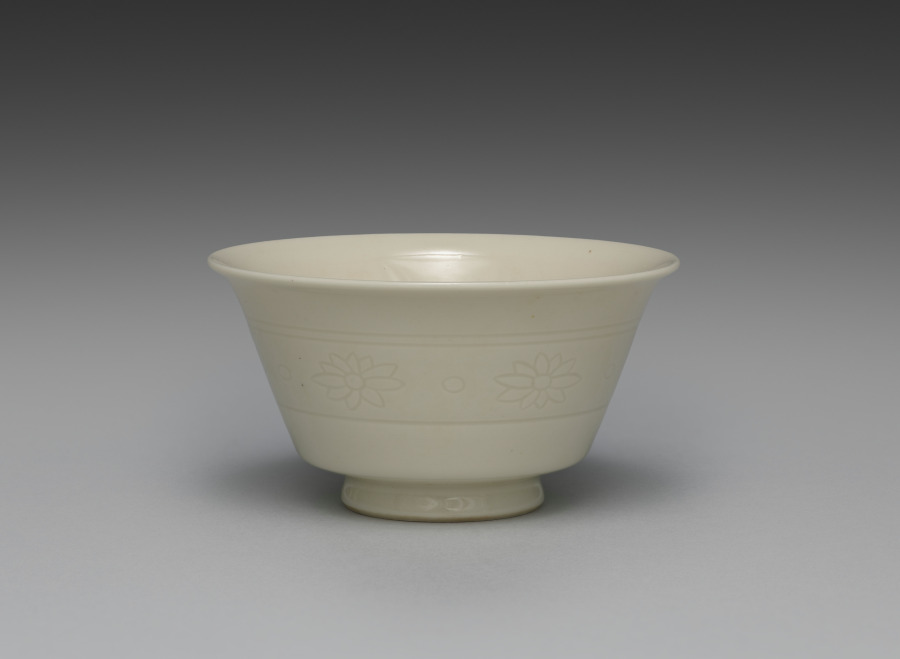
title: Teacup from Teacups with Floral Band Motif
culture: Japan, Meiji period (1868–1912)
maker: Seifū Yohei III (Japanese, 1851–1914)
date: 1893–1914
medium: One from a set of five cups; porcelain with incised decoration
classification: Ceramic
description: The five sencha teacups in this set are decorated with incised flowers and dots between a double band at the top and a single band at the bottom. They are in Yohei III’s creamy taihakuji body and glaze. In their motifs, they are quite similar to an incense burner by Yohei III (see CMA 2022.180), but the flowers are even more simple in design, with no open circle at the center. A label affixed to the side of the box refers to them as “sencha cups in emulation of Korean white [ware].” The reference to Korean ware indicates that even though Yohei was more directly inspired by Qing dynasty wares from the Dehua kilns in Fujian Province in developing his porcelain clay and glaze for works such as these, the general understanding of the continental models still placed them, at least in terms of color, among pieces broadly associated in Japan with Korean white wares. The delicate cups are thinly potted, so they have a highly desirable translucency.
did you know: The delicate cups in this set are thinly potted, so they have a highly desirable translucency.